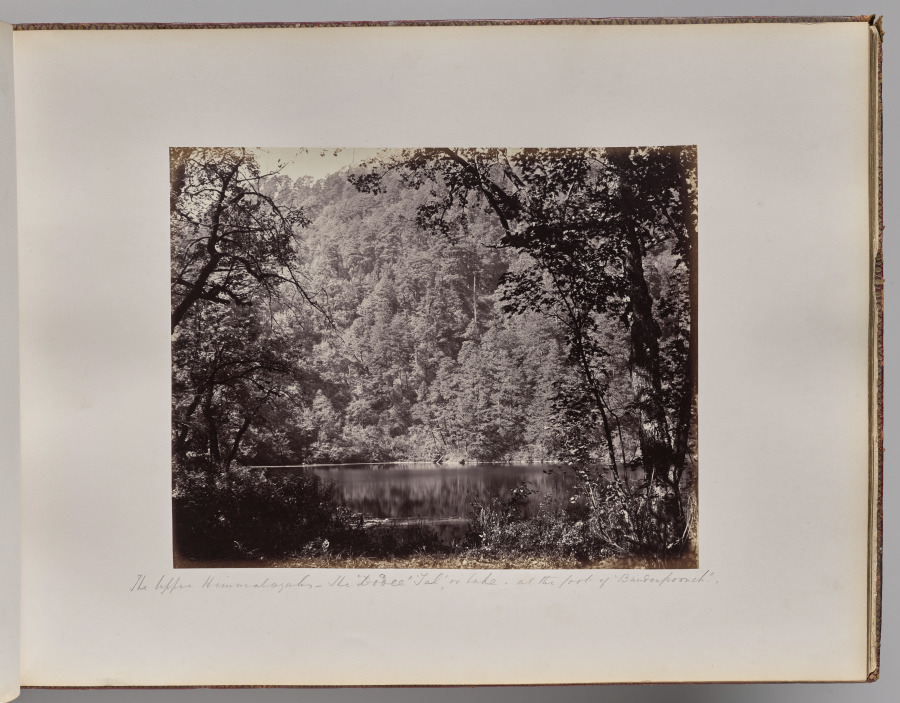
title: The Upper Himmalayahs. The Dodee Tal in Lake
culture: England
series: Photographs of Northern India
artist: Samuel Bourne (British, 1834–1912)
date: 1863–70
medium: albumen print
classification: Photograph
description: The 50 images in this album, all taken in the 1860s, move from the hill towns of the Himalayas down to cities including Lahore (now in Pakistan), Delhi, Lucknow, Agra, Benares (now Varansi), and Calcutta (now Kolkata). Architectural studies of major monuments offer valuable historical records of what sites such as the Taj Mahal and the imperial mosque of the Mughal emperors in Delhi looked like before twentieth-century restorations.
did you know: Samuel Bourne, the author of most the images in this album, was a banker in England before he moved to India to become a professional photographer.